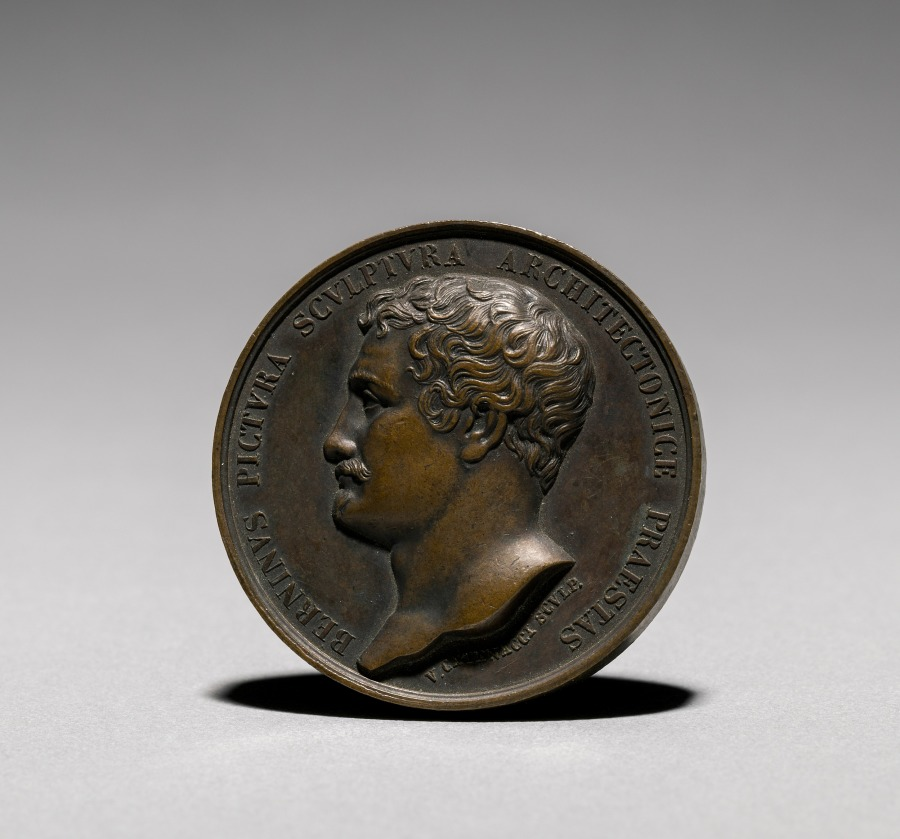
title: Medal Depicting Gian Lorenzo Bernini (1598-1680) from the Illustrious Men of the Kingdom of the Two Sicilies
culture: 20th century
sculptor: V. Catenacci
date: 1830–34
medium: bronze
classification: Metalwork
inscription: On the obverse: BERNINVS PICTVRA SCVLPTVRA ACHITECTO. NICE PRAESTAS Bust of Bernini facing left. Below: V. CATENACCI SCVLP. On the reverse: NEAPOLI NAT. CICICXCVIII OB. ROMAE CICICCLXXX Trestle with tools for sculptor column with tools for architect and stool with palette and brushes, at the bottom easel. Below: A. ARNAUD SCVLP. L. TAGLIONI CON. NEAP.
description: Gian Lorenzo Bernini was an Italian sculptor, urban planner, architect, painter, set designer, and playwright during the Renaissance. He designed many churches, monuments, and the canopy over the high altar at St. Peter's Basilica in Rome.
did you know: Naples was a center of medal and coinage minting for several centuries in the Kingdom of the Two Sicilies.